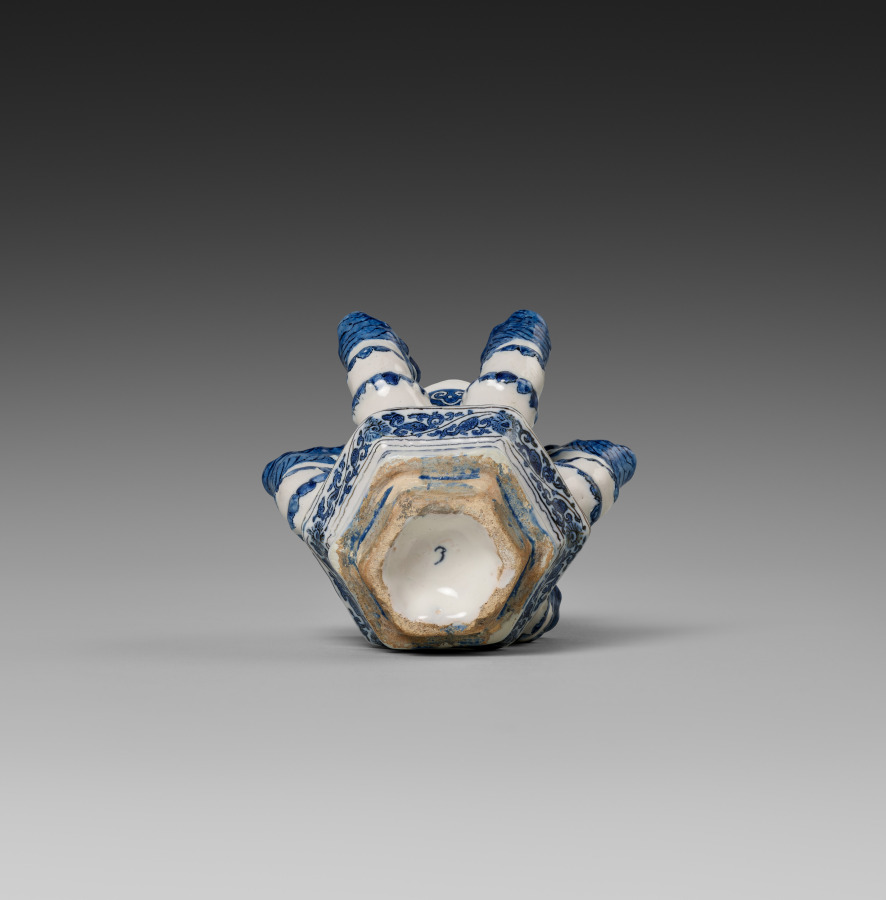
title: Sixth Tier for a Flower Pyramid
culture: Netherlands, Holland, Delft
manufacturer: Adrianus Kocx (Dutch, active 1686–1701)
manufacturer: De Grieksche A (The Greek A) Factory (Netherlands, 1658–1811)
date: c. 1690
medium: Tin-glazed earthenware, painted in blue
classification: Ceramic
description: Allegorical figures representing Faith, Hope, and Love decorate the base of this pyramid, on which rest six tiers with spouts where flowers can be placed. Flower pyramids are among the most complex and luxurious types of ceramics produced in Delft in the late 1600s. This example was made in the Greek A Factory, owned by Adrianus Kocx. During his tenure, the factory became the most prestigious of Delft potteries and received commissions from Queen Mary II, who ruled over England, Scotland, and Ireland together with her husband, William III. She contributed to the international spread of the fashion for Delft ceramics.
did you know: The iconic blue-and-white ceramics from Delft originated as an attempt to copy Chinese porcelain.